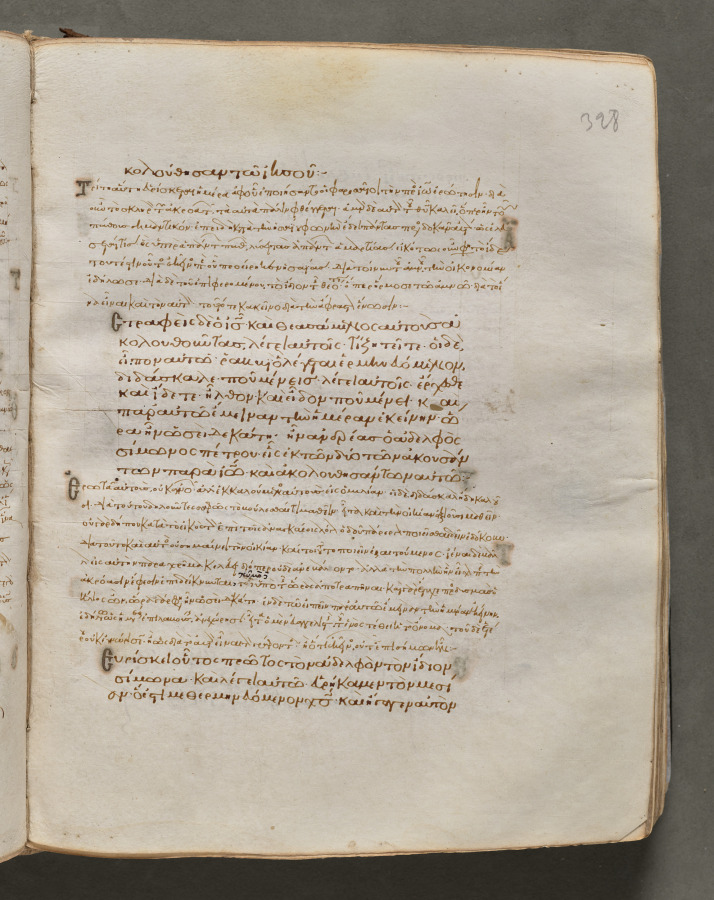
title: Text, folio 328 (recto), from a Gospel Book with Commentaries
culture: Byzantium, Constantinople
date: c. 1000–1100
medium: ink, tempera, and gold on vellum; leather binding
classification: Bound Volume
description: Each of the four gospels in this book opens on a page with brilliantly illuminated borders depicting the author of the text as well as birds—principally peacocks, symbols of the immortality of the soul—and fountains, representing the fountain of life and the salvation of the soul. This volume consists of 428 leaves with texts in Greek. Its level of sophistication suggests that it was probably written and decorated in a monastery in Constantinople.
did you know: Gospel books were carried in procession through Byzantine churches.